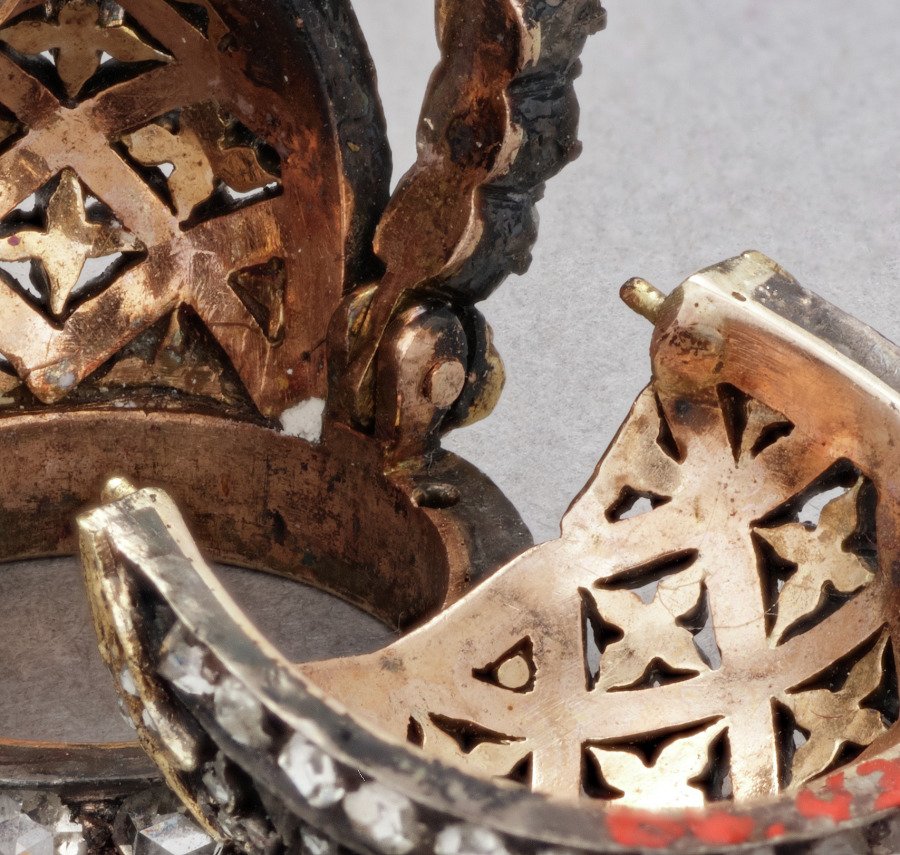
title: Miniature Crown Surprise from the Lapis Lazuli Easter Egg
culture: Russia, St. Petersburg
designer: attributed to Peter Carl Fabergé (Russian, 1846–1920)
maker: attributed to House of Fabergé (Russian, 1842–1918)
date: c. 1885–90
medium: gold, enamel, lapis lazuli, pearls, diamonds, rubies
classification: Miscellaneous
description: This Easter egg, like the subsequent ones produced by Fabergé for the imperial family, contains a surprise when opened. In this case, the egg opens to display a yellow enameled cover, resembling an egg yolk, which then opens to reveal a tiny replica of the Russian imperial crown, containing either a ruby or a pink sapphire suspended on a chain.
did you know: The tiny diamond encrusted crown surprise is a replica of the Russian imperial crown made for Empress Catherine the Great in the 1700s.